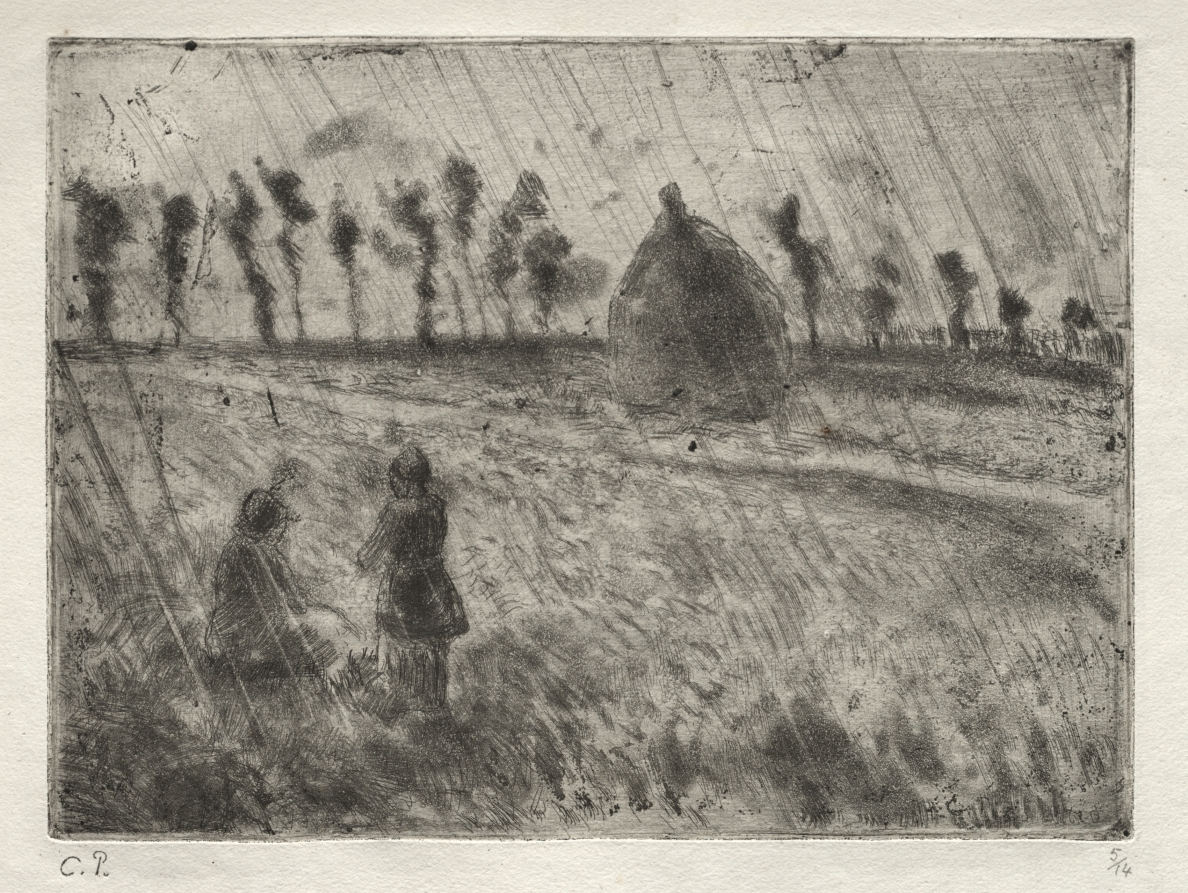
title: Rain Effect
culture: France, 19th century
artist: Camille Pissarro (French, 1830–1903)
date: 1879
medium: etching and aquatint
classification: Print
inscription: Signed, lower right, in plate: C. Pissarro; stamped, lower left margin, in gray: C.P. [Lugt 613e]; inscribed, lower right margin, in graphite: 5/14